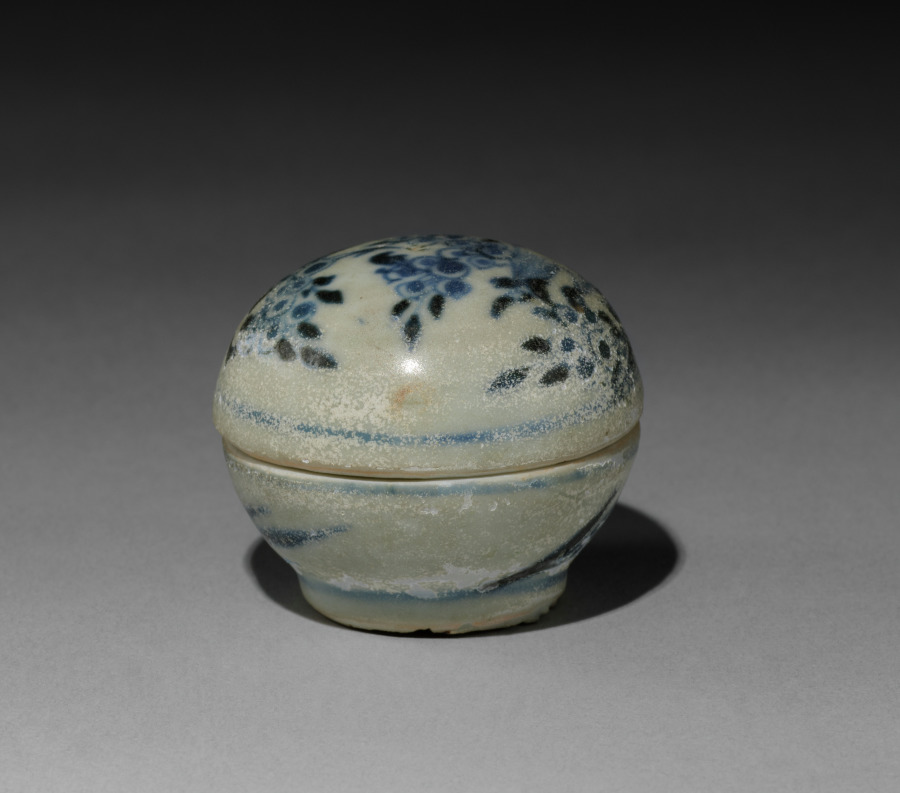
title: Pill Box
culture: China, Qing dynasty (1644-1911)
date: c. 1752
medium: porcelain with blue and white decoration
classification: Ceramic